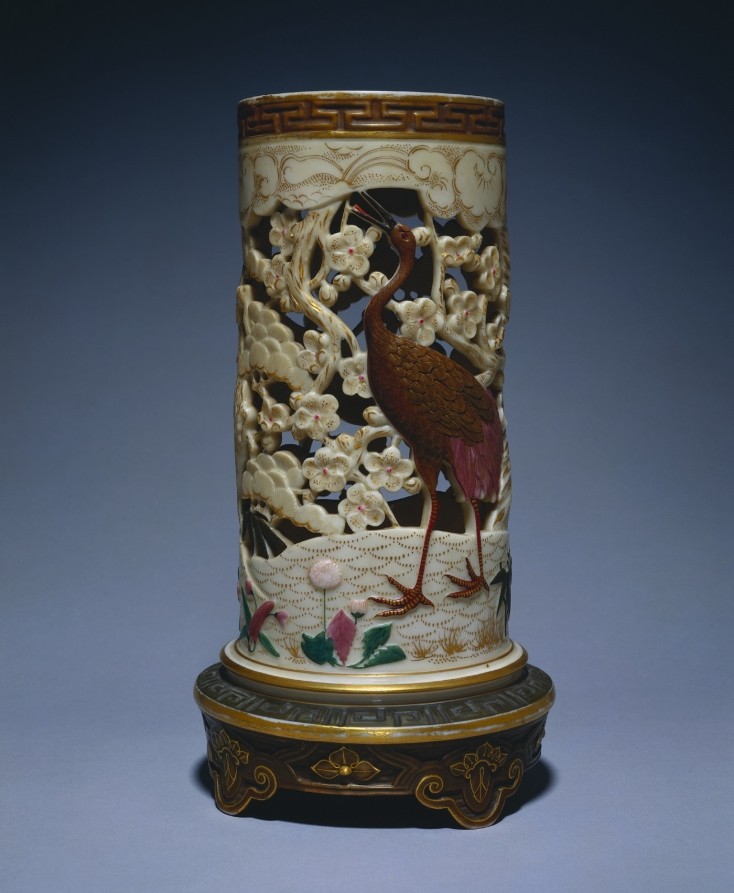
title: Vase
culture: England, 19th century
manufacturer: Worcester Porcelain Factory (British, established 1751)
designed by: probably by James Hadley (British)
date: 1873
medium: ceramic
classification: Ceramic